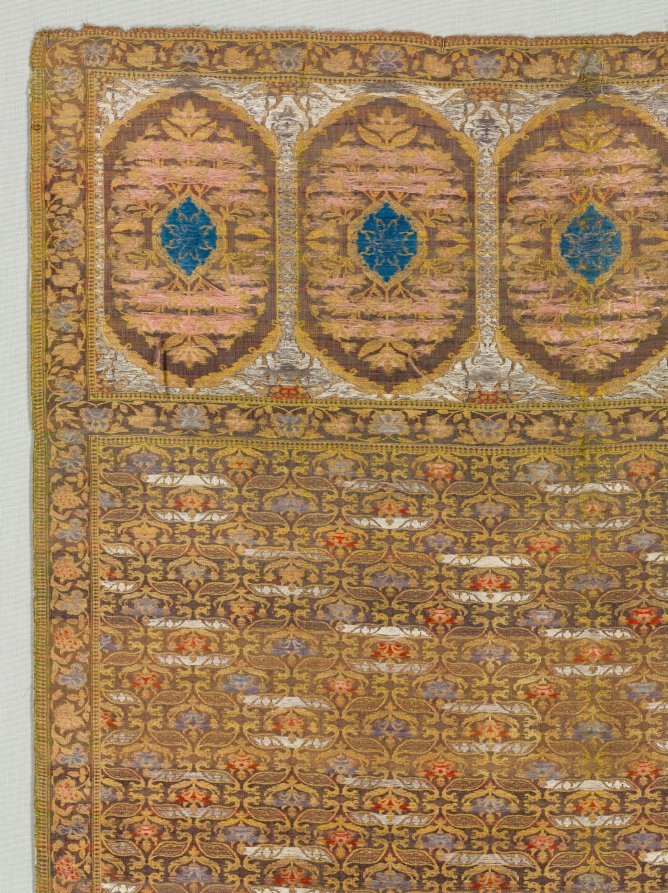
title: Sash with floral field and end panels on a gold ground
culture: Iran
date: 1700s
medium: taqueté with discontinuous wefts: silk, gilt- and silver-metal thread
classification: Textile